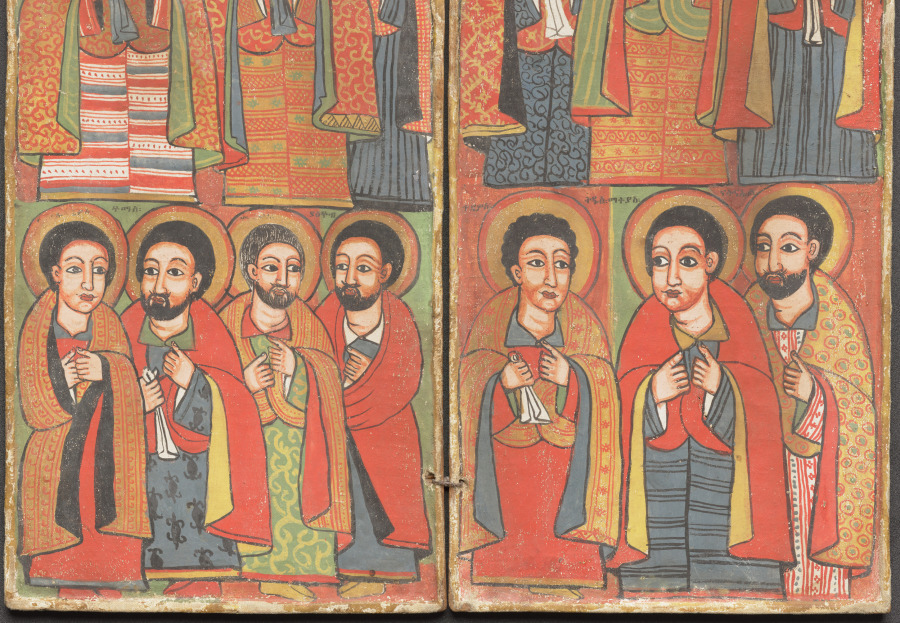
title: Diptych with Twelve Apostles & St. Paul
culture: Africa, East Africa, Ethiopia, presumably Gondär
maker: Workshop or Circle of Wäldä Maryam (Ethiopia, active mid- to late 1600s-early 1700s)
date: c. 1700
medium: Tempera, wood, textile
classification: Painting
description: Depicting 13 holy men, this diptych (two-panel painting) is sized for an Ethiopian Orthodox Christian church or elite home. It is painted in the bold, colorful style associated with royal court workshops from the early 1600s to the mid-1700s. Painter Wäldä Maryam (or someone he trained) set this scene of Christ’s apostles in the context of his homeland. Each saint wears fashionable clothing imported from India. While they are posed and dressed similarly to emphasize their group identity, the artist portrayed their faces and hairstyles individually. Captions in Ge’ez––an eastern African language dating to the 400s BCE––identify each by name.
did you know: Captions written in the language Gəˁəz identify each holy man by name. This African language is nearly 2,500 years old!